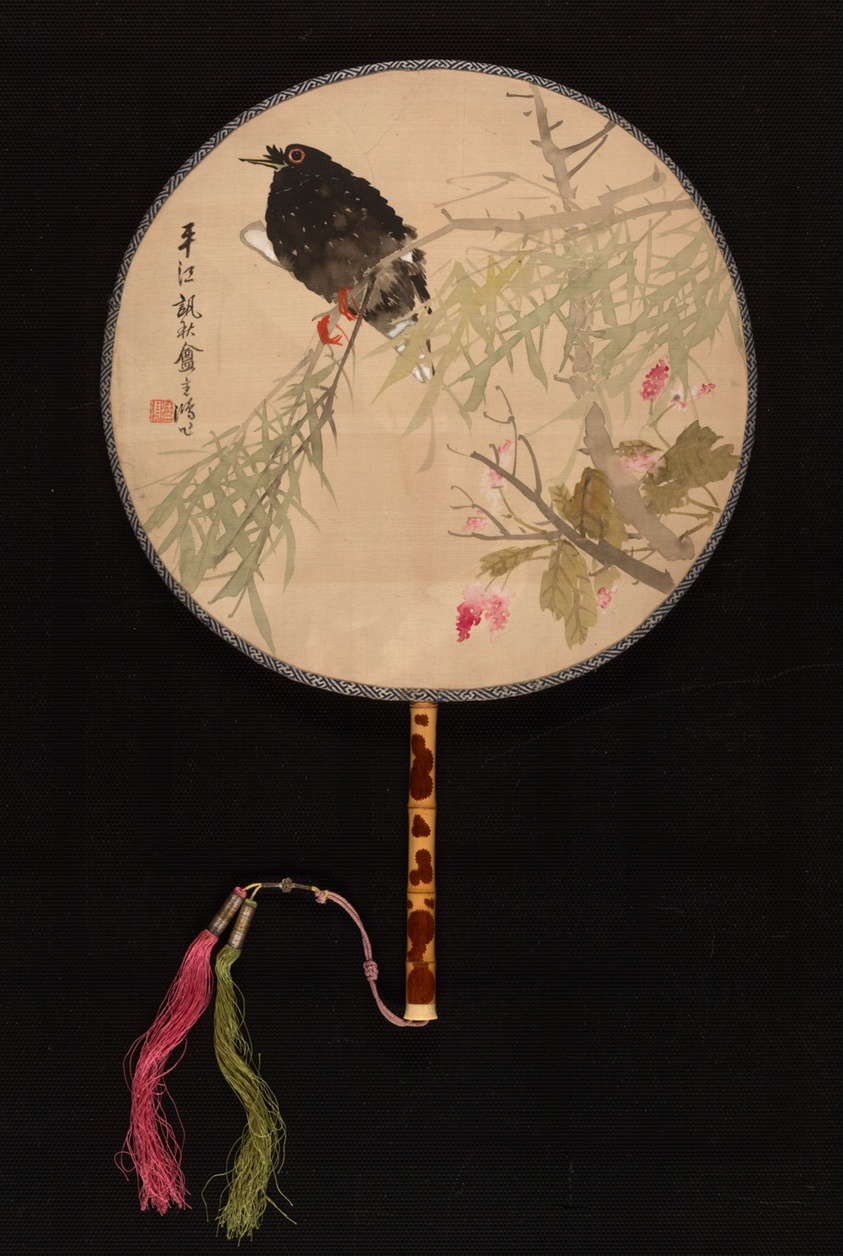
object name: Costume and Accessories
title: Mynah on a Branch 花鸟竹柄团扇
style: Chinese (culture or style)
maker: Pan Hong; Chinese, active 19th century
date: Qing dynasty (1644–1912), 19th century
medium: Fan; ink and colors on silk, with bamboo handle and ivory tip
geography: China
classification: fan; accessories (object genre); asian art; costume